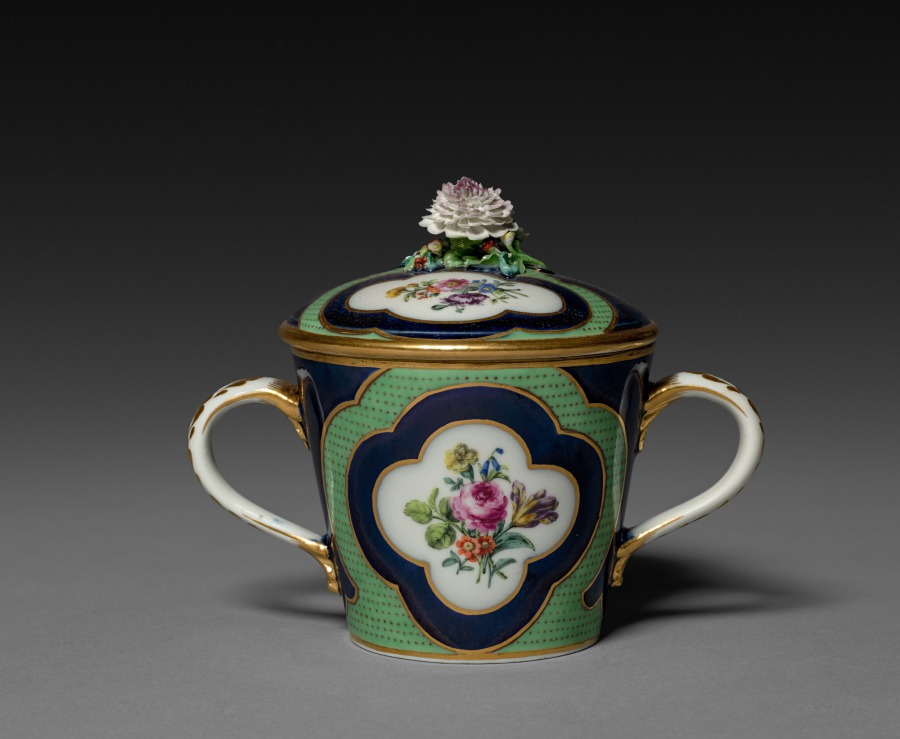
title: Two-Handled Cup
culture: Austria, Vienna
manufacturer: Du Paquier Porcelain Manufactory (Austrian, active 1719–1864)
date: c. 1780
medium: porcelain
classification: Ceramic